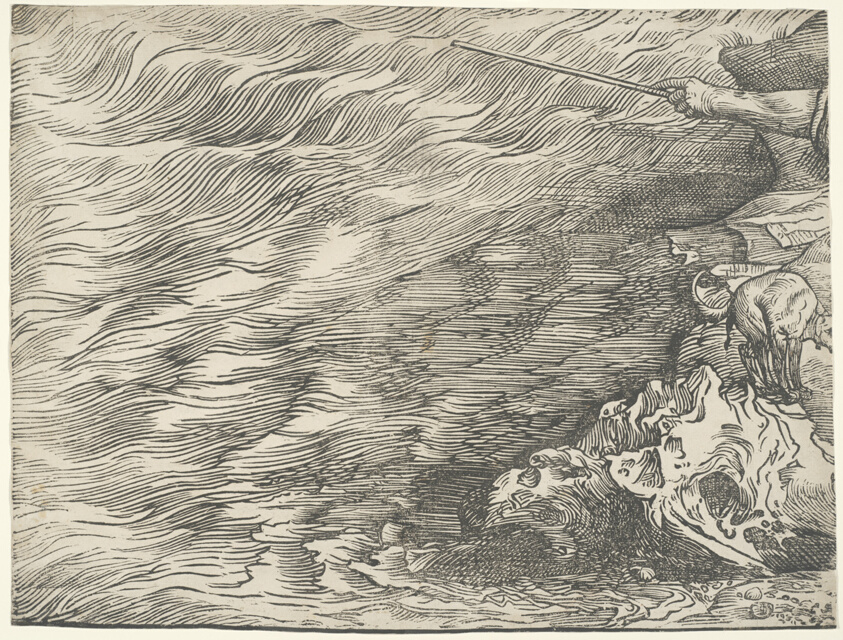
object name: Print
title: The Submersion of Pharaoh's Army in the Red Sea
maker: After Titian (Italian, c. 1488-1576); published by Domenico dalle Greche (Italian, active 1543-1558)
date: c. 1515, printed 1549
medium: Woodcut in black on ivory laid paper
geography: Italy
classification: print; prints and drawing; woodcut